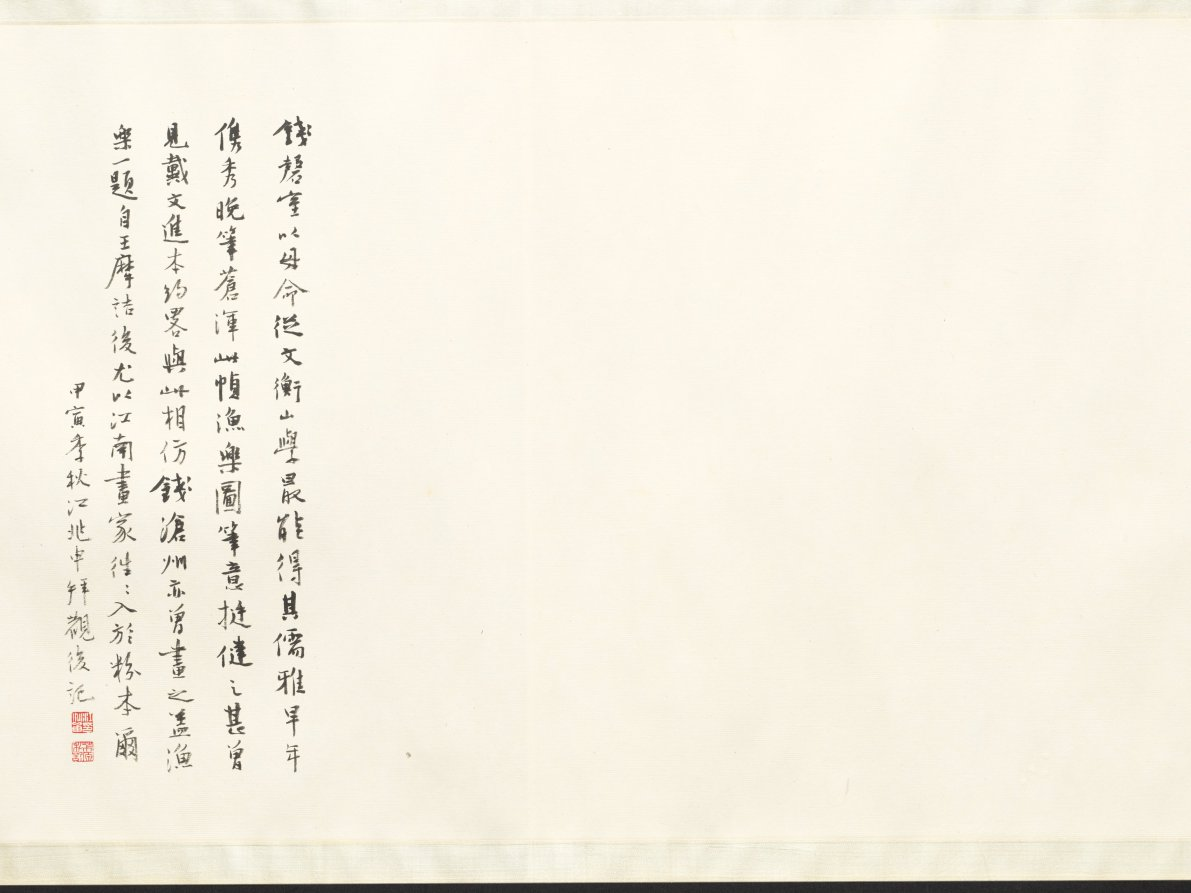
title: Fisherman's Joy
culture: China, Ming dynasty (1368–1644)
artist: Qian Gu (Chinese, 1508–c. 1578)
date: 1572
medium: Handscroll; ink and light color on paper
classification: Painting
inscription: Artist's inscription, signature, and seal: On the autumn day of the jen-shen year [1572], P'eng-ch'eng, Ch'ien Ku painted [this]. [seal] Hsüan-ch'ing shih. 2 colophons, both dated 1689, and 5 additional seals of Yün Shou-p'ing (1633-1690).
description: This painting has a scene showing two small crafts, each manned by two fishermen, practicing a traditional fishing method. In one of them, a man uses a bamboo pole to direct the movements of a cormorant bird sent into the water. Cormorant fishing, witnessed in some areas of the lower Yangzi River, appears in Zhe school paintings. Qian Gu may have borrowed these narrative figure scenes from Zhe school paintings, while his vantage point, brushwork, and soft tones align with the Wu school style. Scenes of fishermen appealed to urban and educated audiences who idealized the self-sufficient independence of fisherfolk.